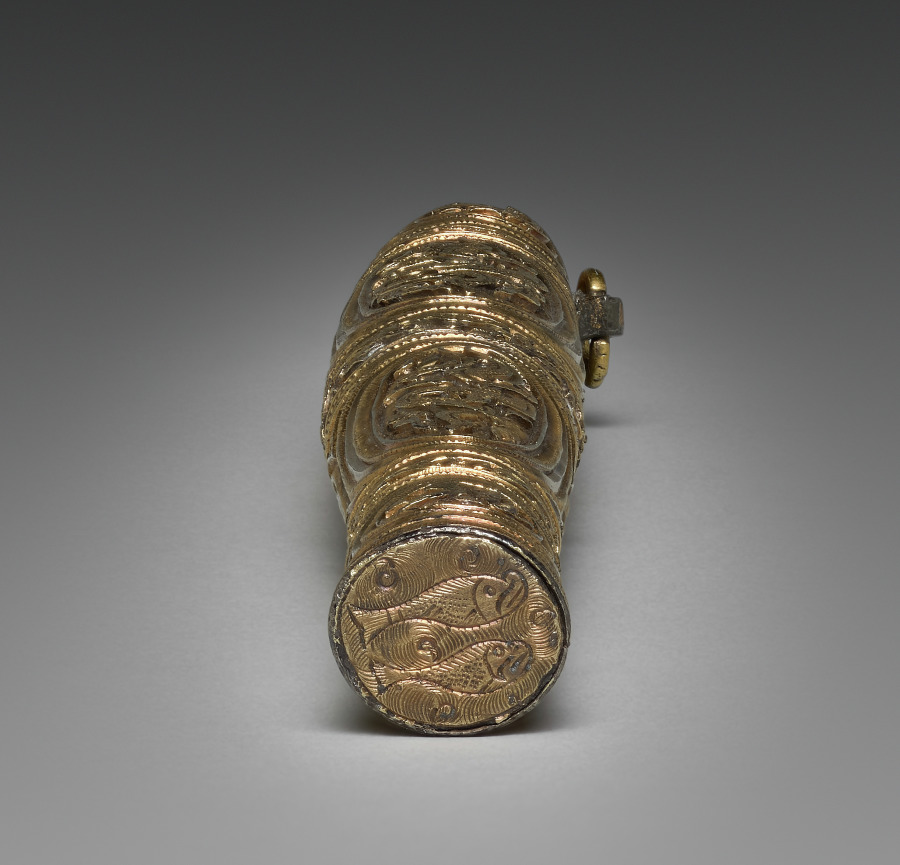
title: Knife Sheath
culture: Korea, Goryeo dynasty (918–1392)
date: 1100s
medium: Gilt silver (body) and brass (trefoil-shaped ring)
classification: Metalwork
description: Made by rolling a flat piece of silver plate, this knife sheath is decorated on each side with oval panels, including two larger middle panels showing an image of rising dragons with ring-punched scales. The circular upper panels bear the image of seated phoenixes. The flat bottom is engraved with a pair of fish, symbolizing harmonious unity. The trefoil-shaped ring attached to the tip of the sheath allows a string to connect it as a pendant to a belt. In medieval Korea, a miniature sheath such as this was considered an important fashion item, especially for elite members of the ruling class.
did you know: This 12th-century silver-gilt knife sheath is meant to be a pendent to a belt as a luxury ornament.